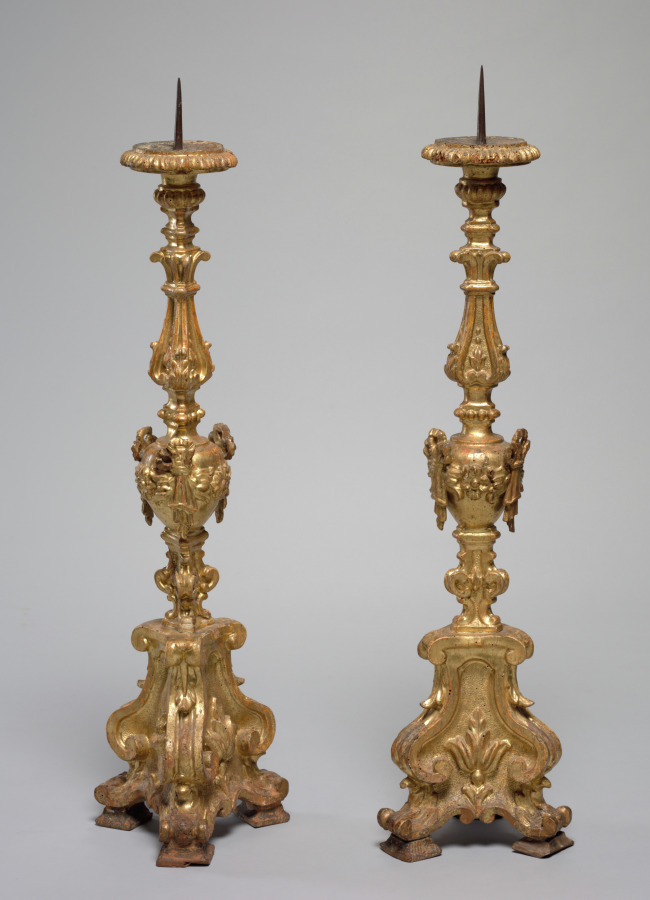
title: Pair of Candleholders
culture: Italy, mid-late 17th century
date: mid-late 1600s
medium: gilded wood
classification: Furniture and woodwork